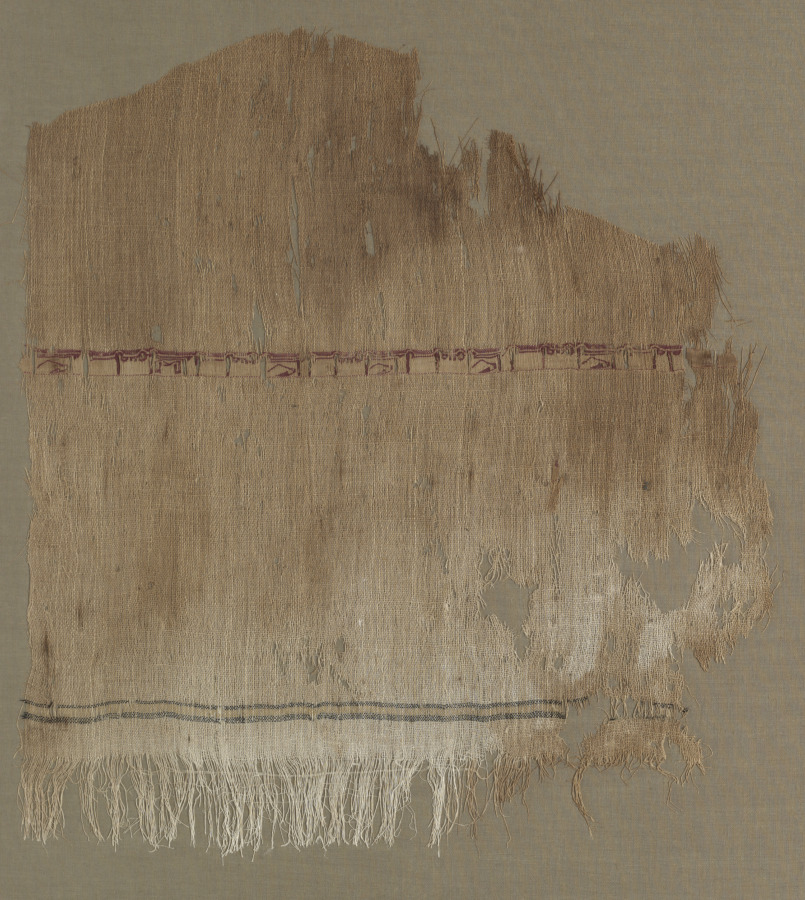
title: Fragment of a Tiraz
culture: Egypt, Fatimid period, Caliphate of al-Zahir, AH 418-427, 11th Century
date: 1027–36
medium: Linen and silk: tabby ground with inwoven tapestry ornament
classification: Textile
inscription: The inscription repeats the phrase: "Dominion is God's."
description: There is a single narrow tapestry band decorated with a line of inscription in simple Kufic letters. The little flourishes between the shafts of some of the letters are abbreviated versions of floriated arabesques. Near the top of the piece, the plain linen ground is interrupted by three narrow bands, each consisting of a few picks in dark blue and yellow silk. The inscription repeats the phrase: "Dominion is God's."